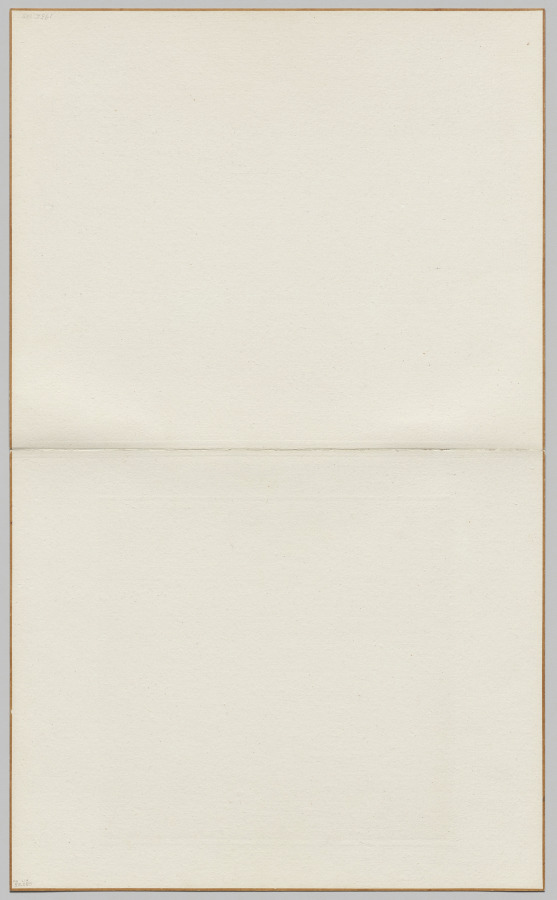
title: Landscape with Flying Geese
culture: China, Southern Song dynasty (1127-1279)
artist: Ma Lin (Chinese, c. 1185–after 1260)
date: mid-1200s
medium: Album leaf; ink and slight color on silk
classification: Painting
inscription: 臣馬麟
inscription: 3 half-seals: 1 official seal of Yuan Dynasty; 1 of Ming imperial collection (used 1372-84); 1 official seal of Ming Dynasty.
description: This minimalist landscape places most of the representational elements in the lower right foreground. A lone gentleman strolls along a zigzagging path by the water. With the gentleman’s staff acting as a visual cue, the viewer’s gaze is directed to geese flying over distant mountains. The scene of a marshland, with its wet and soft ground dotted with vegetation, suggests springtime in Jiangnan. Combined with the flying geese, the album evokes the poetic lines: By spring fields, geese are about to return, Under chilly waters, fish are submerging. 春郊欲回雁, 寒水正沉鱼